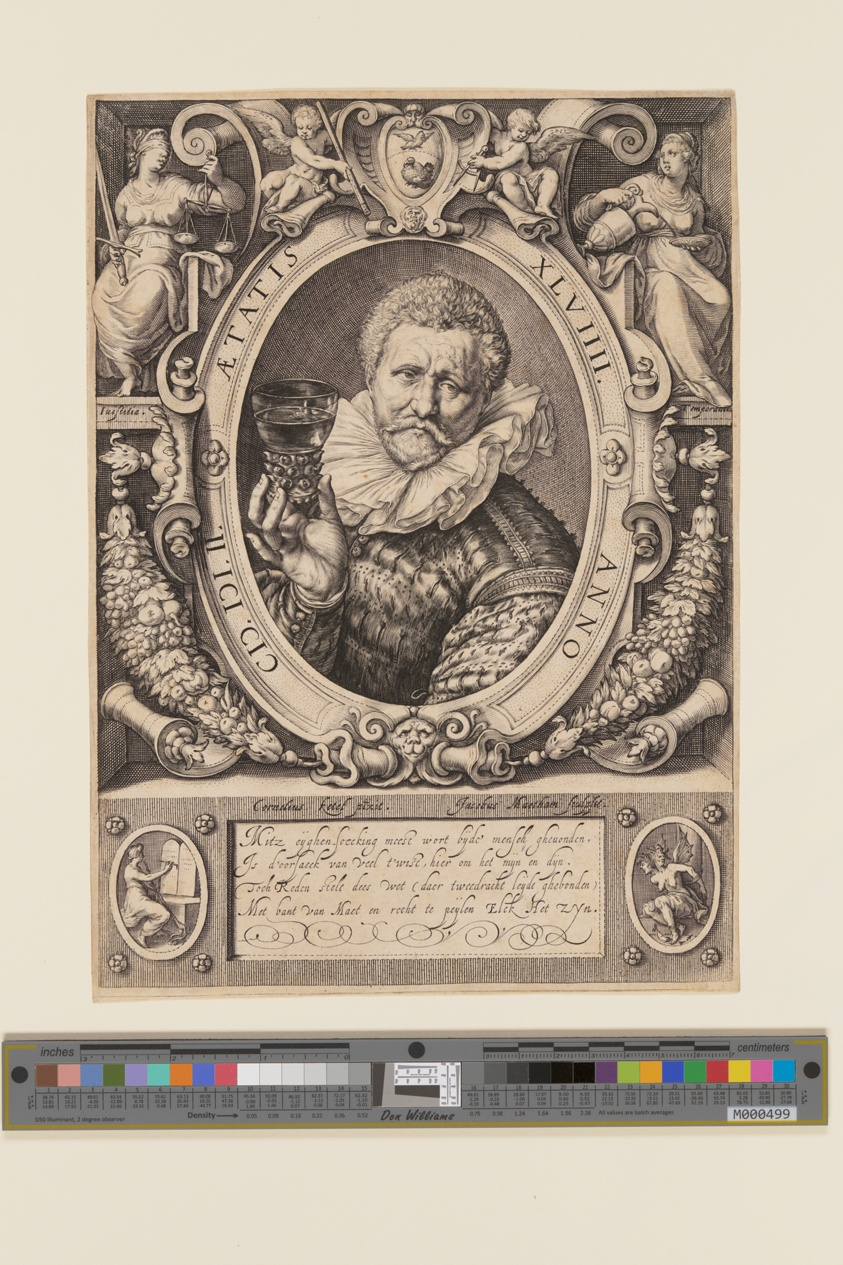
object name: Print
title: Vincent Jacobsz. Coster, wine merchant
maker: Jacob Matham (Dutch, 1571–1631); after Cornelis Ketel (Dutch, 1548-1616)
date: 1602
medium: Engraving on ivory laid paper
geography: Netherlands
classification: engraving; paper; print; prints and drawing